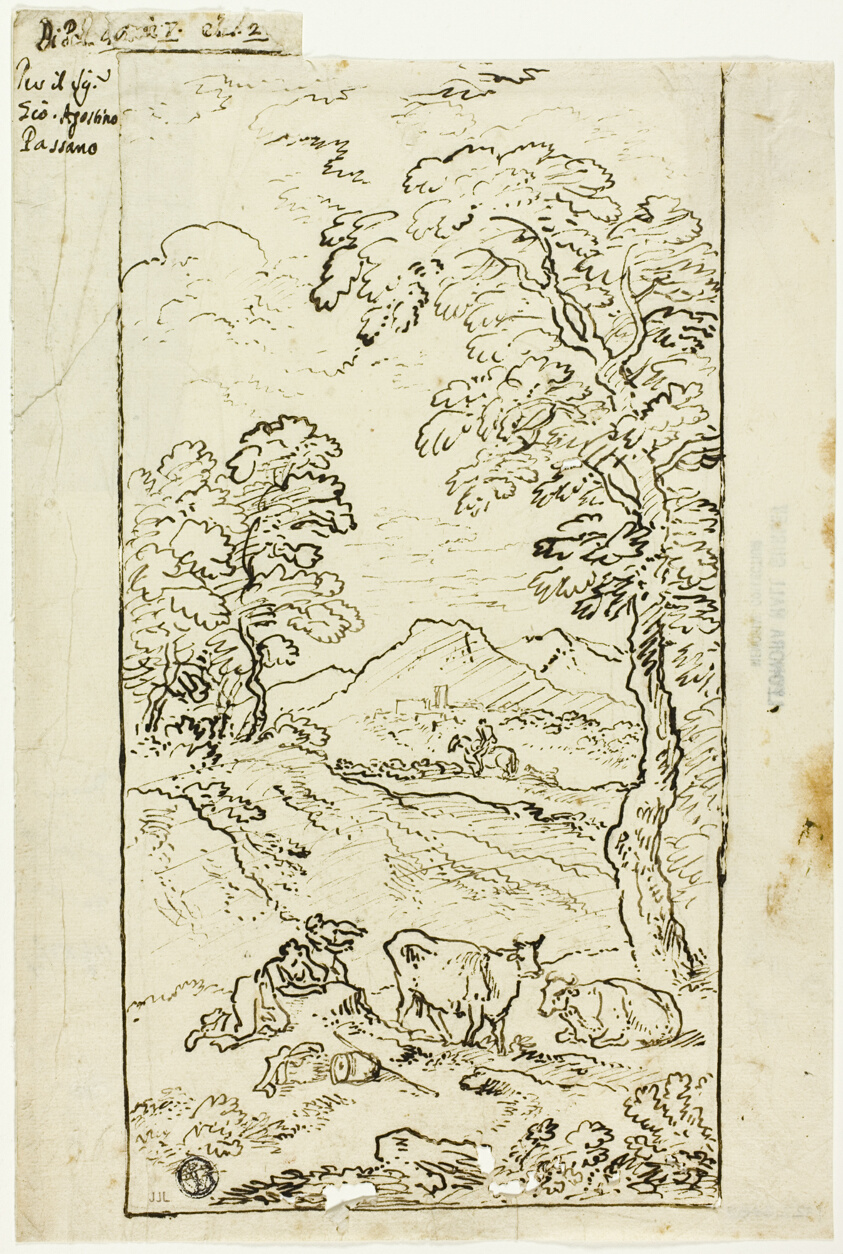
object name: Drawing and Watercolor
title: Hilly Landscape with Cows and Shepherds in Foreground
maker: Attributed to Carlo Antonio Tavella; Italian, 1668-1738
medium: Pen and iron gall ink on cream laid paper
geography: Italy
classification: pen and ink drawings; drawings (visual works); prints and drawing